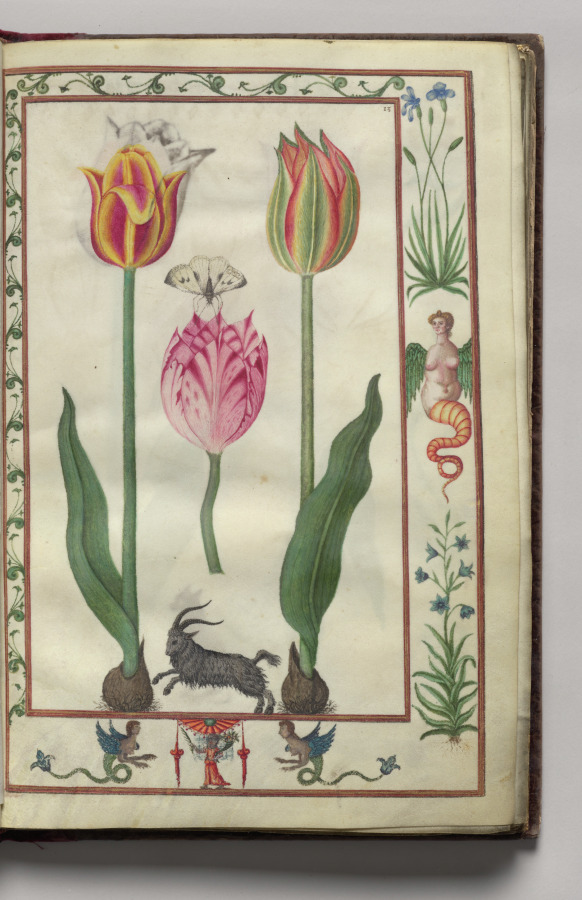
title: Tulips, Moth, and Goat with Hybrid Creature Border, folio 7 (recto), from Florilegium (A Book of Flower Studies)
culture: France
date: 1608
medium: watercolor, ink, silver, and gold over occasional traces of pencil, on vellum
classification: Bound Volume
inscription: Dated: Poitiers 1608 (on frontispiece) Signed: On frontispiece in black ink, lower right: Van Kuyk Notation on drawing: Frontispiece: in pencil, lower margin: * élève de Van Kessel, peintre flammand (* in pencil also appears in front of Van Kuyk's name).